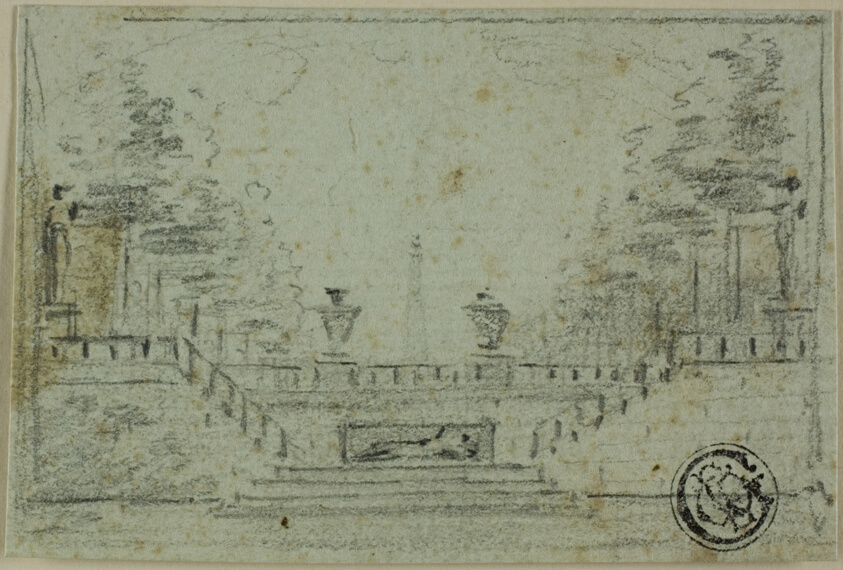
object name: Drawing and Watercolor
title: Staircase and Terrace in Formal Garden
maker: Domenico Quaglio II; German, 1787-1837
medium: Graphite, on blue laid paper, tipped onto cream wove paper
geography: Germany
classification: graphite; drawings (visual works); prints and drawing